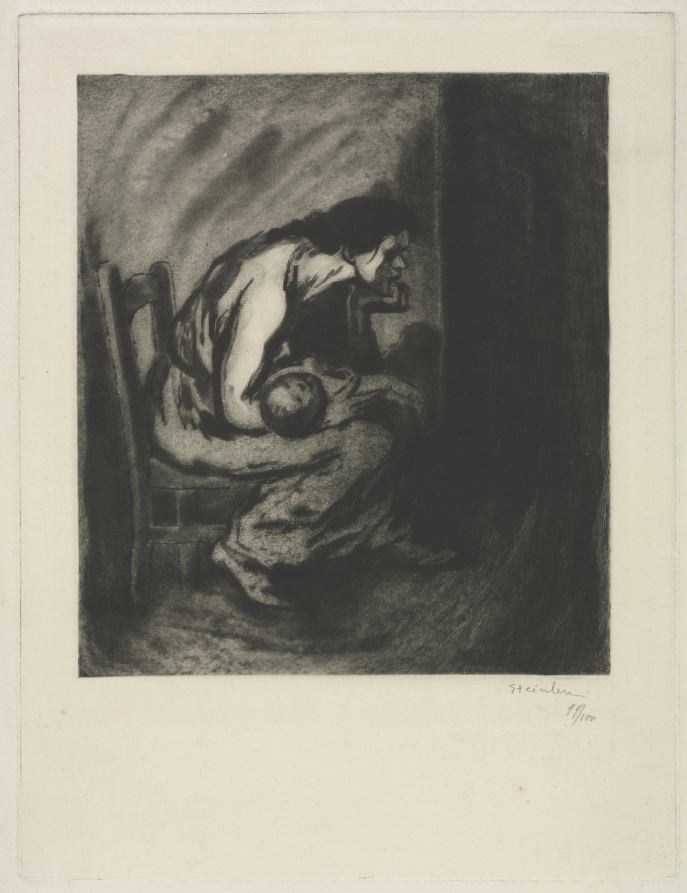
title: The Sick Child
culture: Switzerland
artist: Théophile Alexandre Steinlen (Swiss, 1859–1923)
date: 1902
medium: aquatint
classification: Print